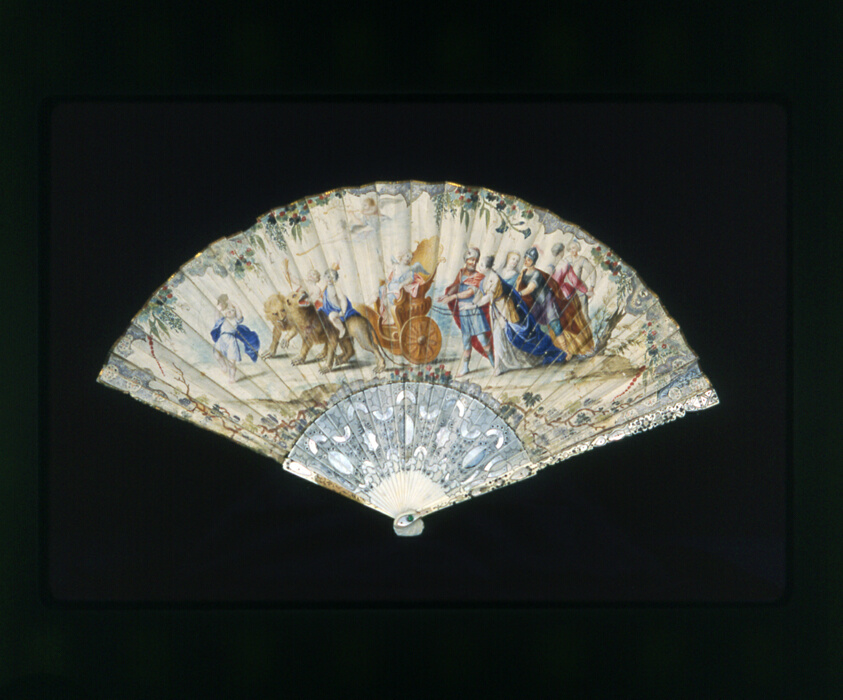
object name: Costume and Accessories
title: Fan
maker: France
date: 18th century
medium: Ivory guards and sticks, etched and carved; metal and mother-of-pearl insets; paper mount painted; gold leaf; metal pin with imitation gemstones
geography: France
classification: textile; fan - paper; costume accessory - folding fan; costume accessory; costume